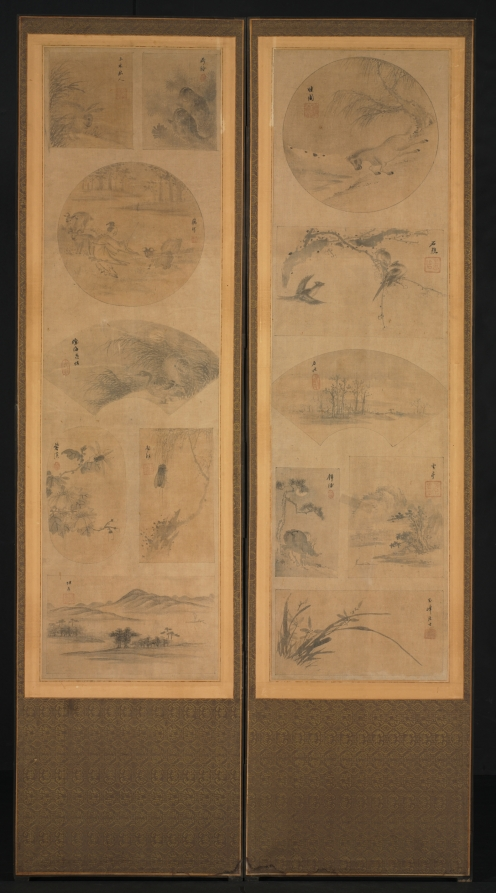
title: Painting of One Hundred Themes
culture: Korea, Joseon dynasty (1392–1910)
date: late 1800s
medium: Ten-panel folding screen affixed with album leaves (obverse), calligraphy (reverse), ink and color on silk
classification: Painting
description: The front of this screen features an assortment of subjects: birds and flowers, landscapes, and scenes of everyday life, mostly in monochromatic ink with light colors. The screen’s reverse side conveys a number of classical poems about the fleeting beauty of the four seasons. Traditionally, only one side of a folding screen bears painted or embroidered images, since these were used as a background furnishing. In Korean houses by the 1800s and early 1900s, however, two-sided folding screens became noticeably popular, possibly inspired by Japanese double-sided folding screens, which mainly served as room dividers in Japanese households.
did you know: The way of displaying small images of various subjects became one of the most popular type of painting toward the end of the 19th century.